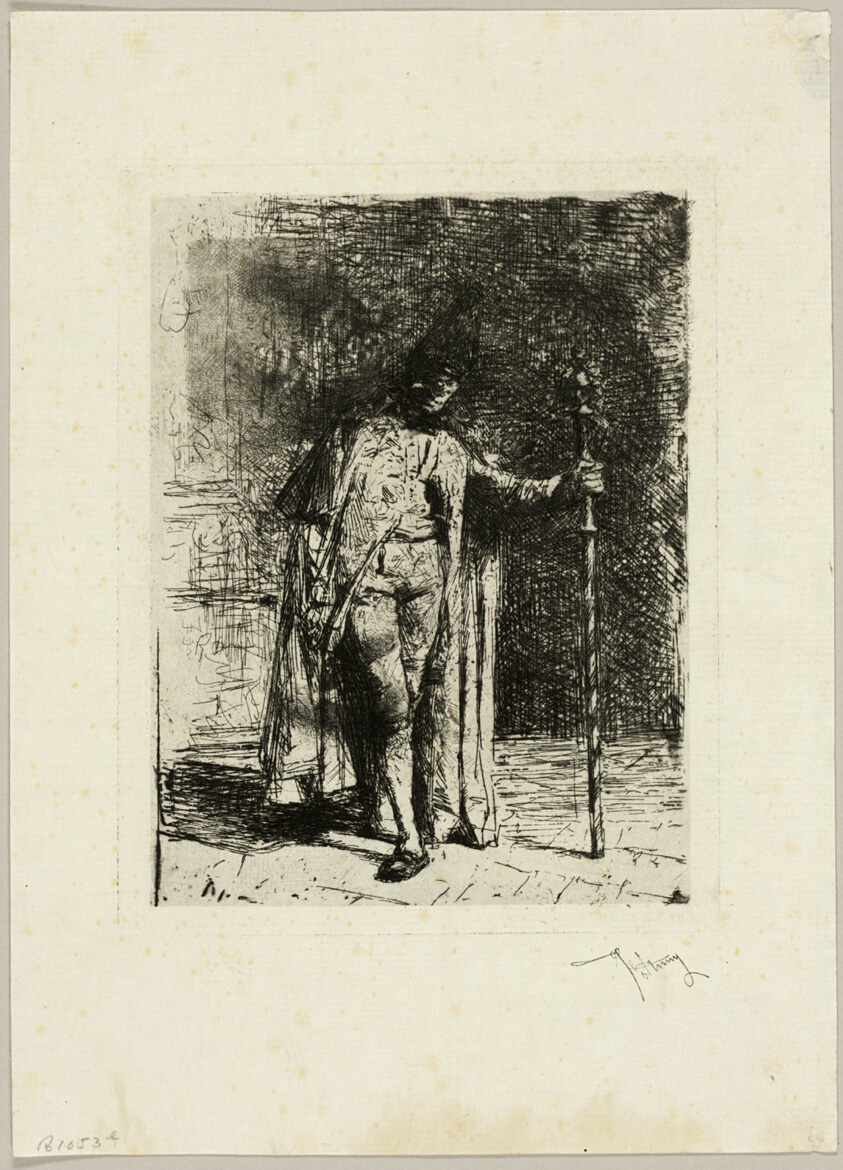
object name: Print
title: A Master of Ceremonies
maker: Mariano José María Bernardo Fortuny y Carbó; Spanish, 1838-1874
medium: Etching on paper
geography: Spain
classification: etching; print; prints and drawing